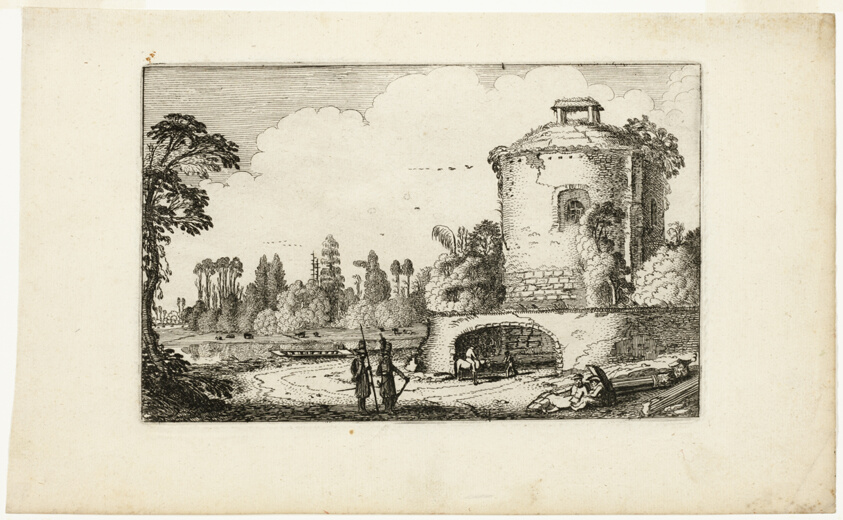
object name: Print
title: Landscape with a Round Tower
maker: Jan van de Velde II; Dutch, c. 1593-1641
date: 1616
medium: Etching on cream laid paper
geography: Holland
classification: etching; print; prints and drawing